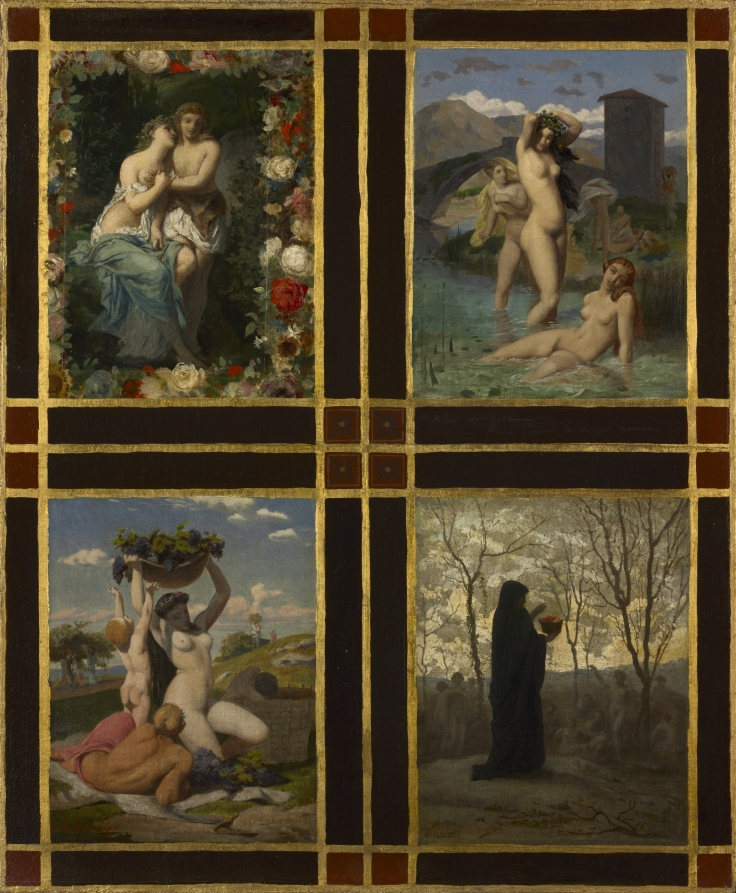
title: The Four Seasons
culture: France, 19th century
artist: Henry Picou (French, 1824–1895)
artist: Jean-Léon Gérôme (French, 1824–1904)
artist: Gustave Rodolphe Boulanger (French, 1824–1888)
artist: Jean-Louis Hamon (French, 1821–1874)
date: 1850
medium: oil on fabric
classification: Painting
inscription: Signatures: The top left quadrant by Picou, Spring, is initialed "H. P." in red paint on the left side; the top right quadrant by Gérôme, Summer, is inscribed "A leur Ami Got" with the artists' names, Picou, Gérôme, Boulanger, and Hamon, in that order; the bottom left quadrant, Autumn, is signed "G. R. Boulanger" in red paint; the bottom right quadrant, Winter, is signed "Hamon" in brown paint.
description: The artists who painted this work belonged to a group called the Néo-Grecs (New Greeks). They concentrated on depicting scenes of daily life in ancient Greece and Rome—often with an erotic slant. Here, relying on a popular Greco-Roman theme, the four works represent the seasons and their associated activities: the pursuit of love in spring; bathing in summer; harvesting grapes in fall; and a funerary ritual in winter. The decorative gold, black, and red borders also enhance the classical aspect of the work by recalling the painted wall decorations of the ancient Roman city of Pompeii. The artists painted this work for their friend, French actor Edmond Got (1822–1901). They likely presented this picture to him in commemoration of his election to the Comédie- Francaise acting company and as a memento of their friendship.